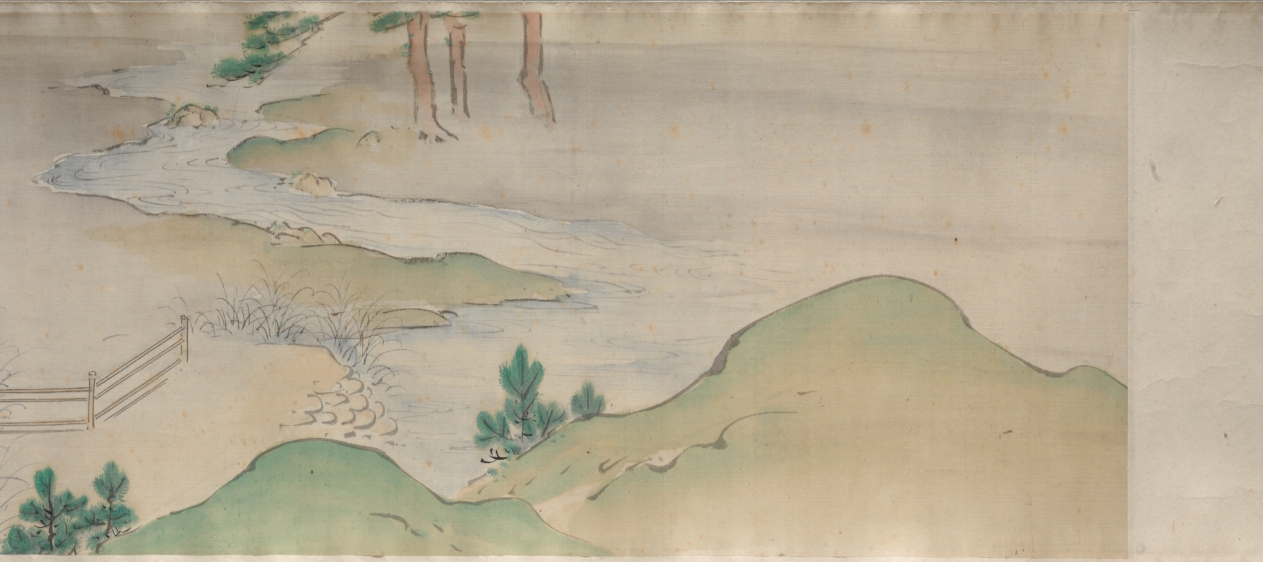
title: The Shadow Dancers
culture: Japan, Edo period (1615–1868)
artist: Yamamoto Baiitsu (Japanese, 1783–1856)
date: 1800s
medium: handscroll, ink and color on silk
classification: Painting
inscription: artist's signature and two seals at end of painting.